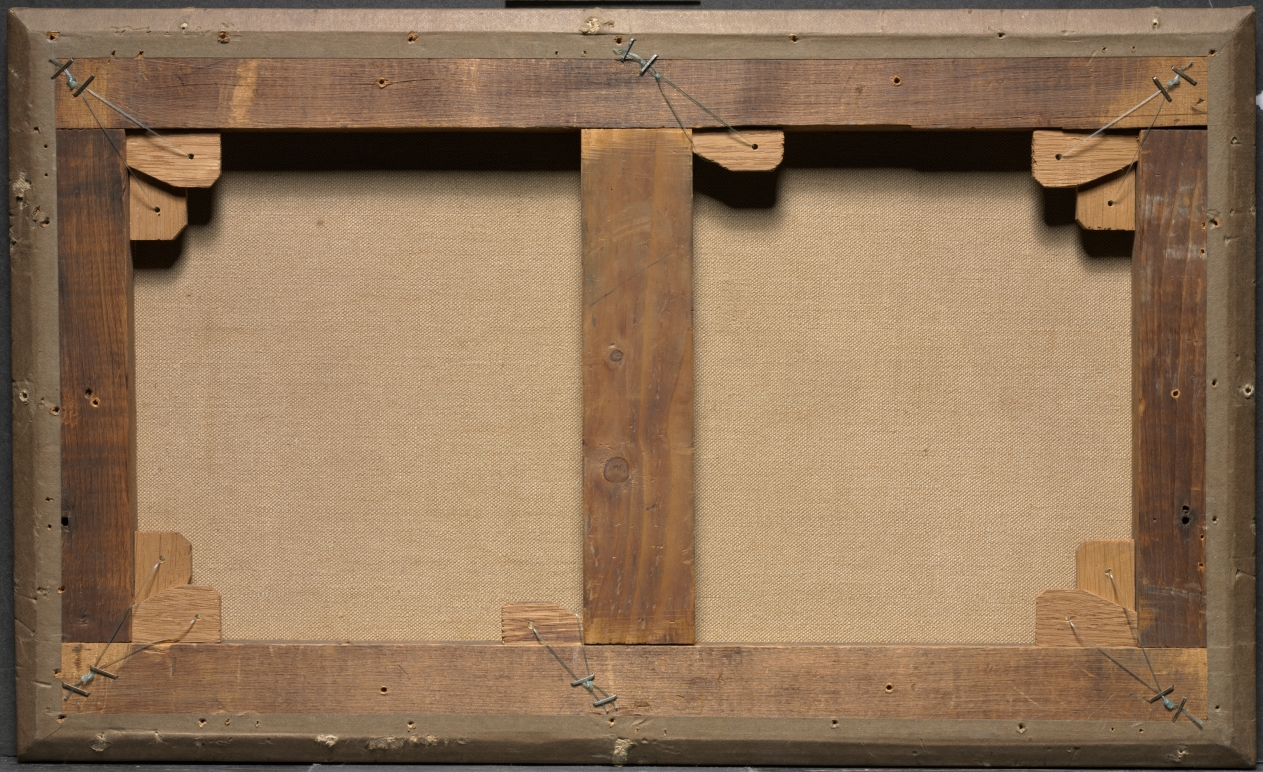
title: Storm Clouds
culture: America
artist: John Henry Twachtman (American, 1853–1902)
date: 1880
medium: oil on canvas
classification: Painting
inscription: Signed lower right: "J H Twachtman / 1880"